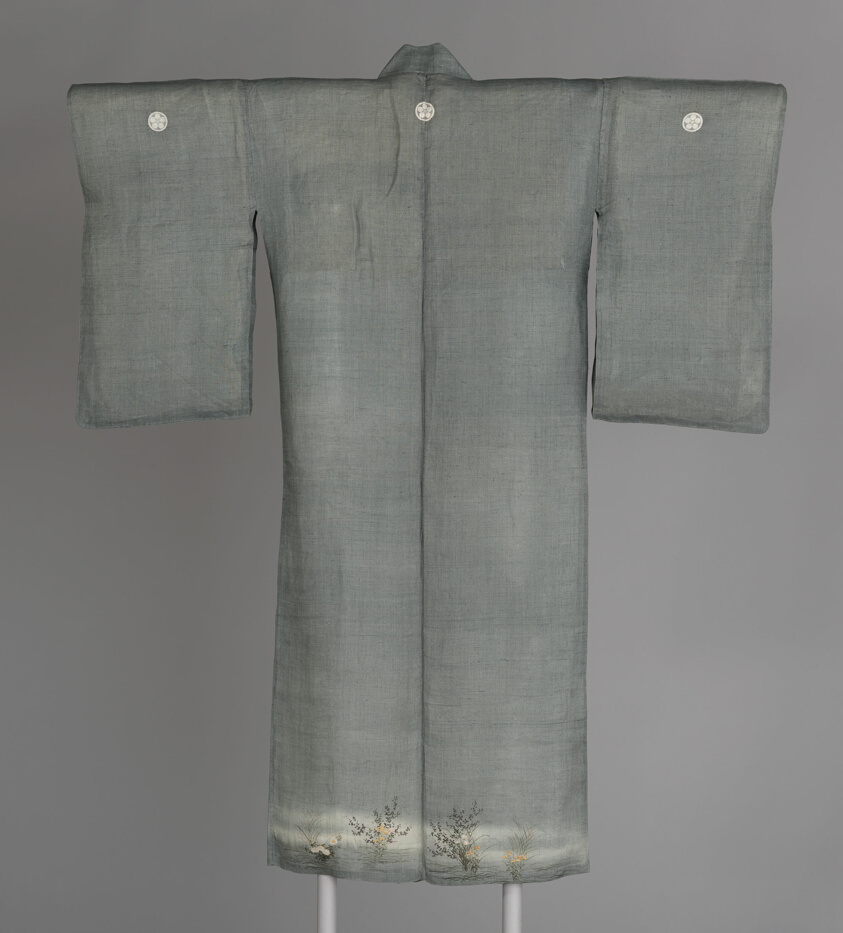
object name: Textile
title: Kuro Tomesode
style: meiji, Japanism, East Asian, asian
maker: Japan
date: Meiji period (1868–1912), c. 1885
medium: Hemp, plain weave; dye extracted using a chemical dye stripper (bassen); painted; lined with cotton, plain weave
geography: Japan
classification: textile; weaving - printed; costume; dress (garment); clothing